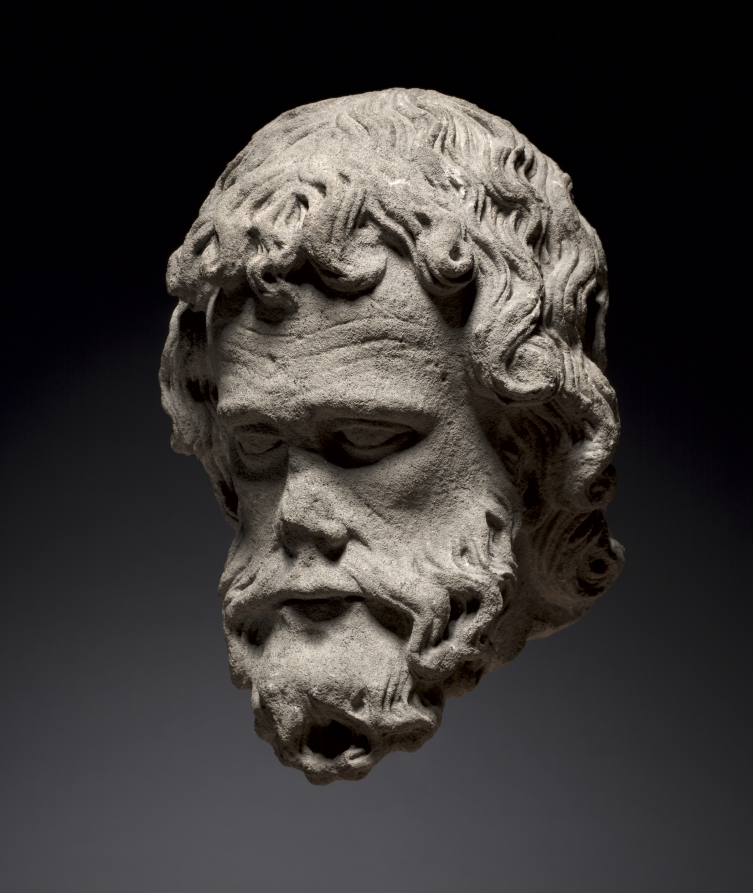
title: Head of an Apostle from the South Portal of the Cathedral of Thérouanne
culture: Northern France (Pas-de-Calais), Thérouanne, 13th century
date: c. 1235–1240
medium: oolitic limestone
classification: Sculpture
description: These monumental stone heads are among the substantial known remains of the sculptural program of Thérouanne’s cathedral, which was razed by Emperor Charles V of Spain in June 1553. These heads were found in a wall of rue Ste. Croix in the town of Saint Omer (a short distance to the north) in January 1923. This group of sculptures from the gable of the south portal of Thérouanne, which includes a stylistically related Christ as Judge, is recorded to have been moved to the Cathedral of Saint Omer in 1554. With their deeply carved wavy hair, curly beards, wrinkled foreheads, and ponderous facial features, these imposing heads—even in their now fragmentary and weathered state—attest to the powerful monumentality of the stone sculpture covering French church facades of the Gothic period.